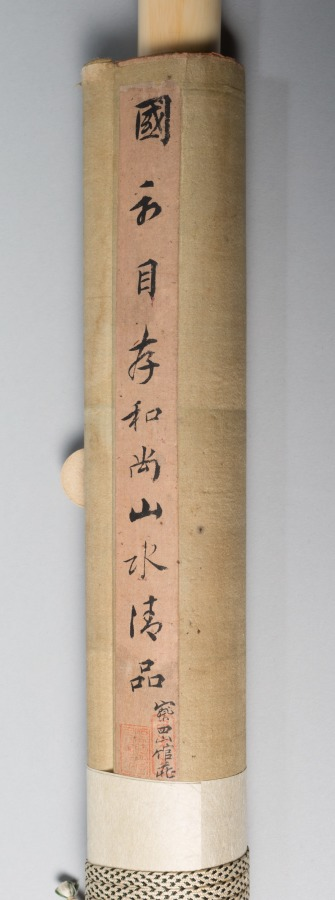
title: The Crossing of the Yangzi River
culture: China, Qing dynasty (1644-1911)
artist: Shang Rui (Chinese, 1634?-)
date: c. 1700–1720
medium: hanging scroll, ink and slight color on paper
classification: Painting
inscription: Colophons: One upper left inscription by the artist followed by two seals; one upper right inscription followed by two seals; three other seals, one in lower left